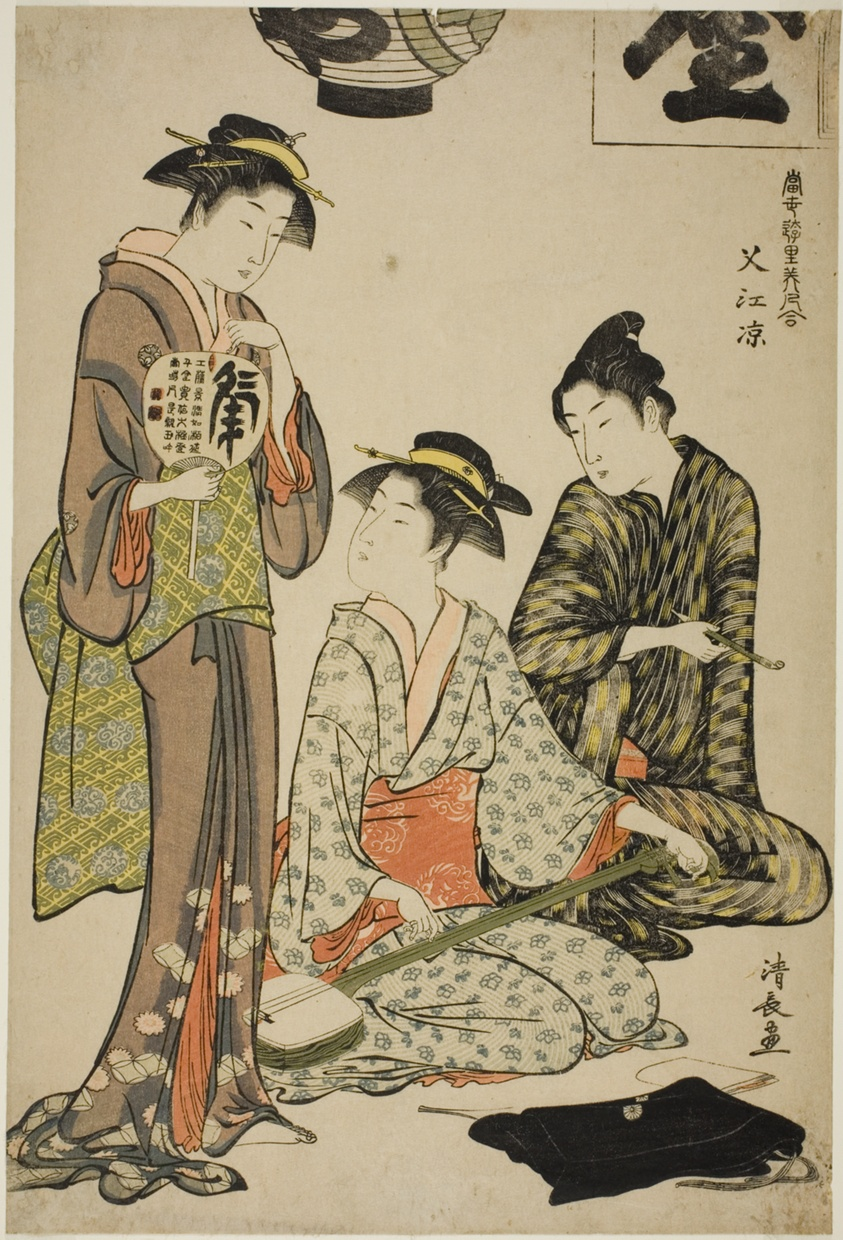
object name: Print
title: Cooling off at Nakasu (Nakasu no suzumi), from the series "A Collection of Contemporary Beauties of the Pleasure Quarters (Tosei yuri bijin awase)"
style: Japanese (culture or style)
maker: Torii Kiyonaga (Japanese, 1752-1815)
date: c. 1783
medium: Color woodblock print; oban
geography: Japan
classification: woodblock print; print; asian art